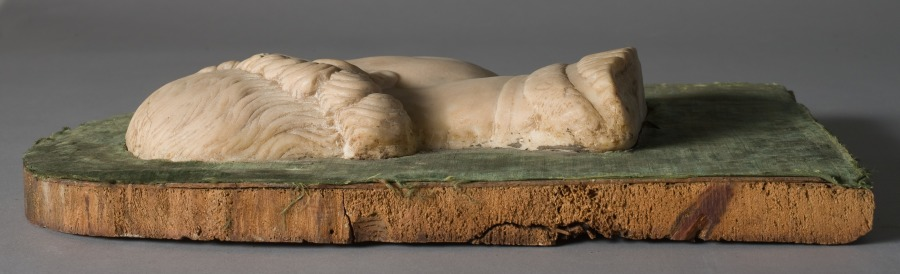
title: Portrait of Francesco Sforza and Frame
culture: Italy, Lombardy, 15th century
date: 1450–1499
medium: marble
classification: Sculpture